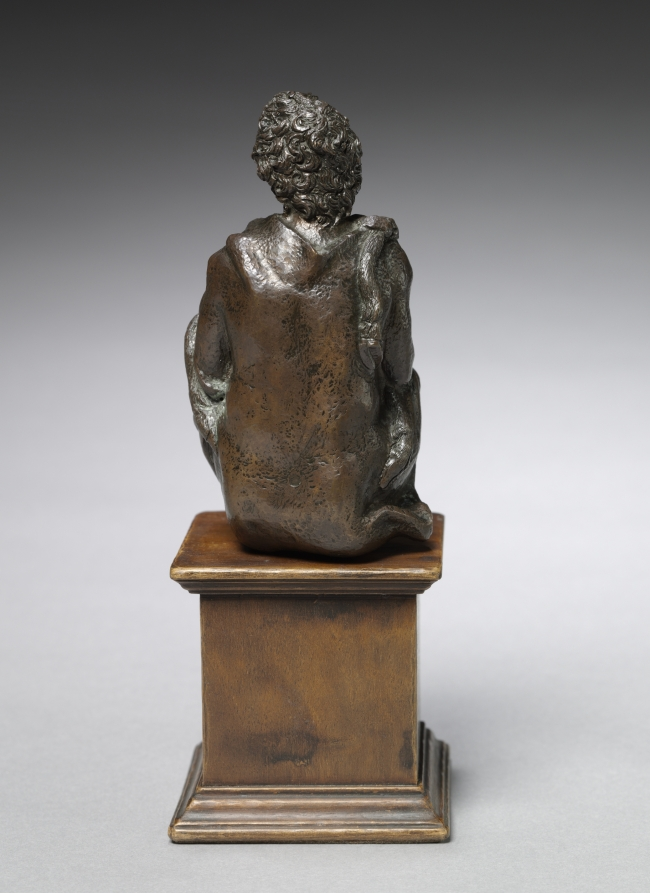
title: Seated Boy Clothed with Goat Skins Holding an Open Barrel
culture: Italy, Padua, 16th century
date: c. 1525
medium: bronze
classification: Sculpture